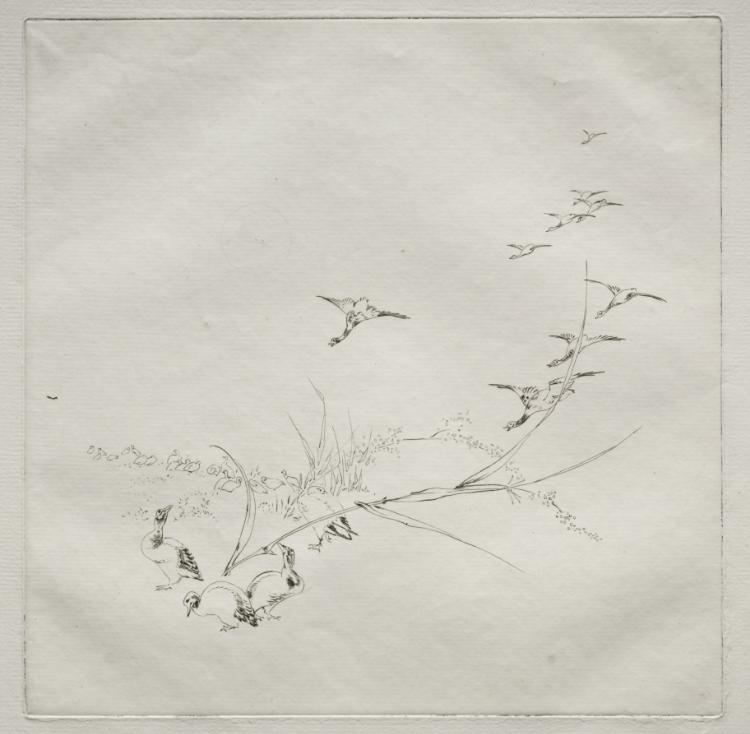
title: Parisian Service (Haviland service): Right in the sun (no. 9)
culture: France, 19th century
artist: Félix Bracquemond (French, 1833–1914)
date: 1875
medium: etching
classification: Print